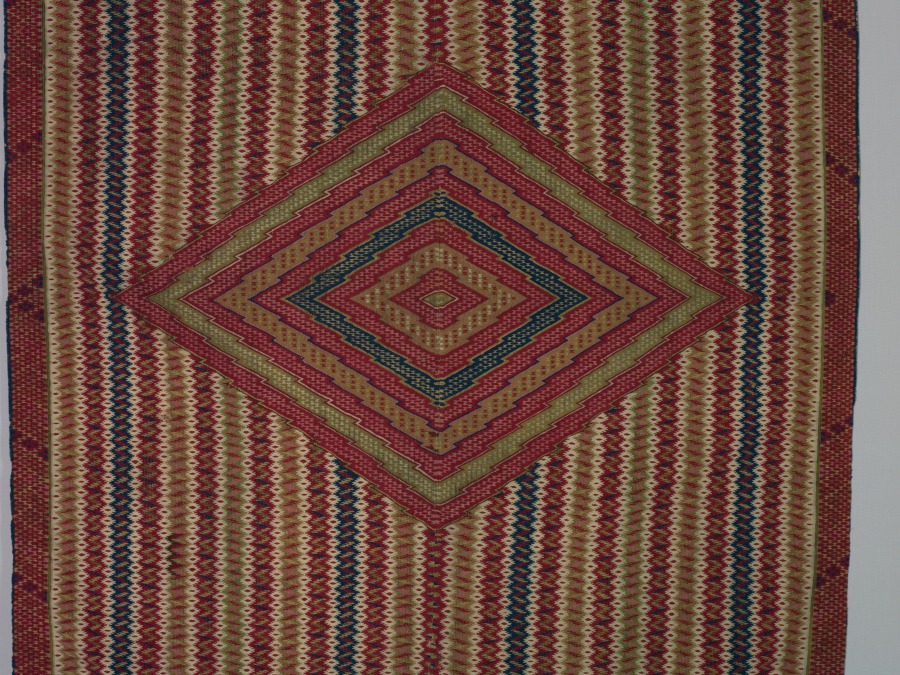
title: Sarape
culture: America, Native North American, Southwest, Mexico, Saltillo, Post-Contact, Classic Period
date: c. 1820–1860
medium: tapestry weave: cotton and wool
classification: Textile